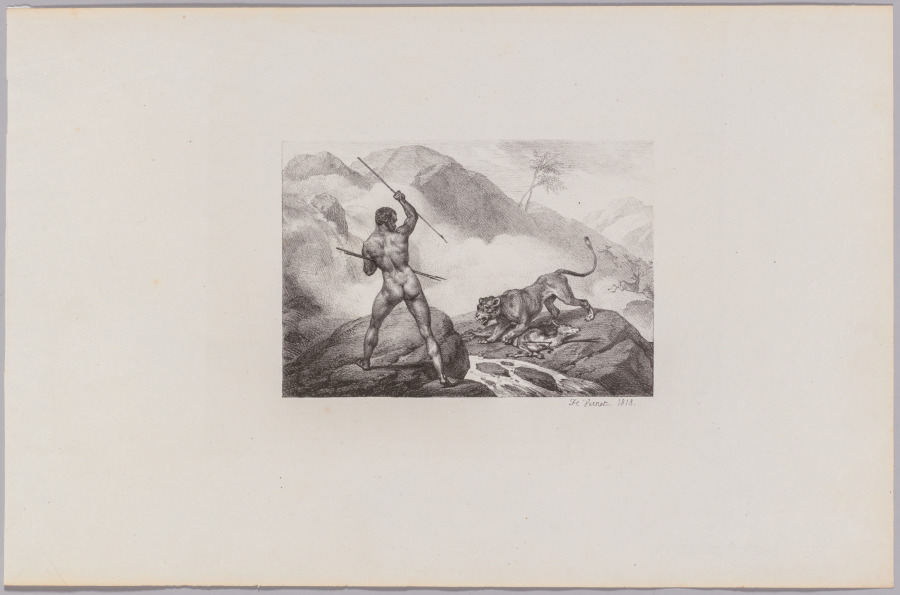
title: African Hunter (Chasseur Africain)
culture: France, 19th century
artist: Horace Vernet (French, 1789–1863)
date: 1818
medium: lithograph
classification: Print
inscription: Below image, in print: H Vernet, 1818. On mat: Proof before title, $425 Tom French, print dealer, Akron, OH 99'